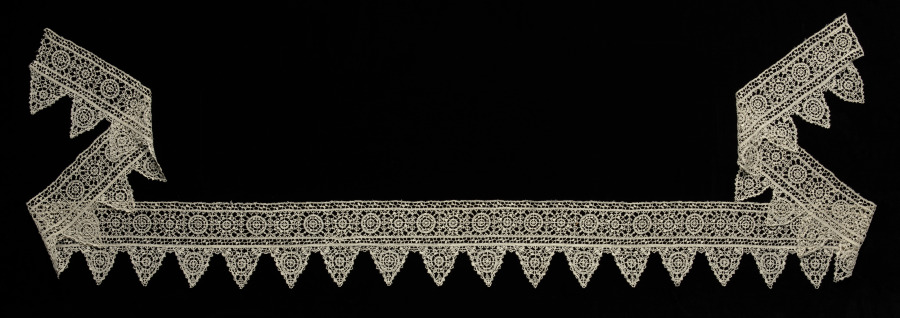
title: Lace Fragment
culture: Italy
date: 1500s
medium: Needle lace (reticella) insertion and edging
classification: Lace